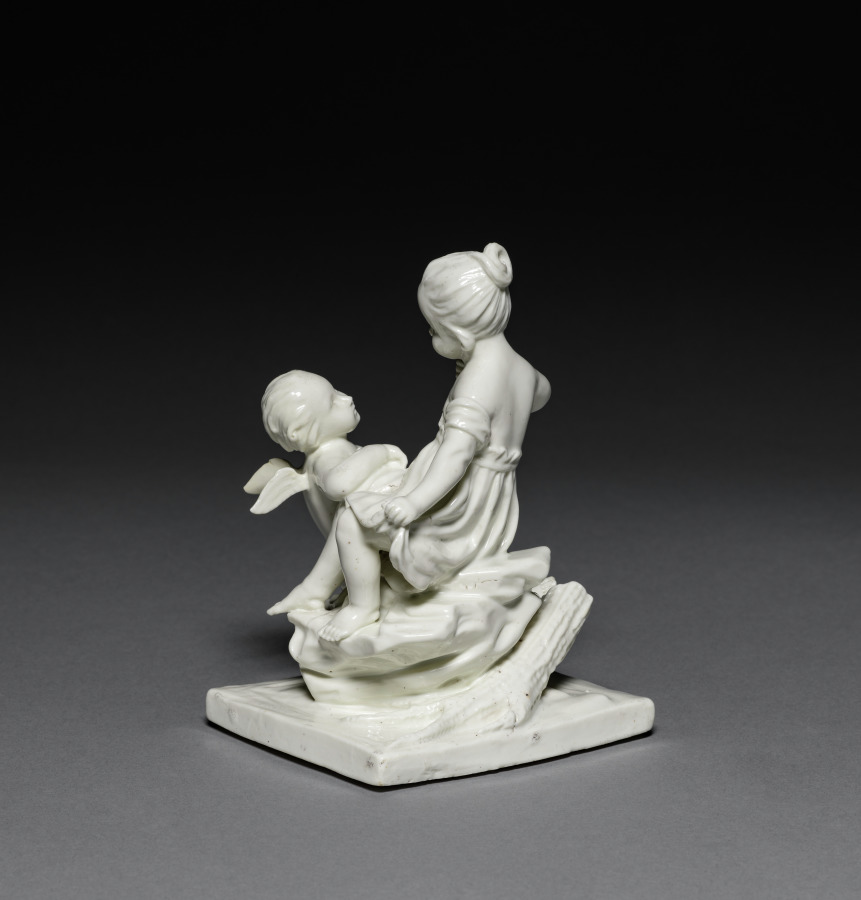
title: Girl with Putto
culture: France, Chantilly, 18th century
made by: probably by Chantilly Porcelain Factory (French)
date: 1760s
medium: soft-paste porcelain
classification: Ceramic